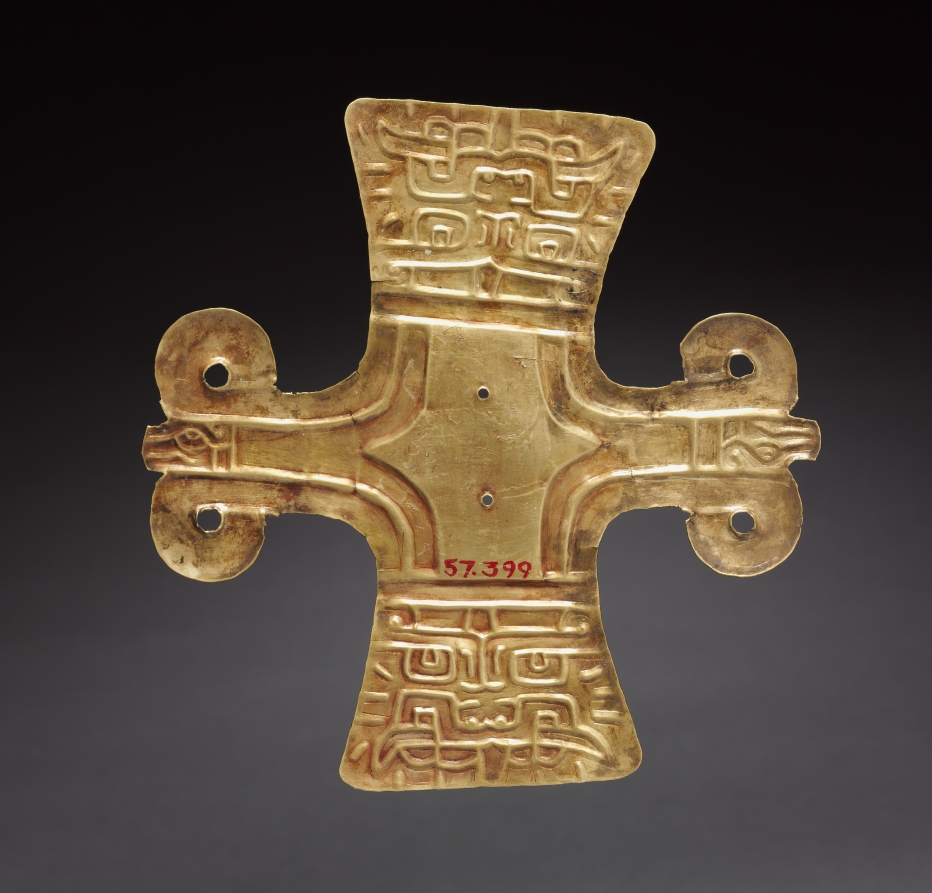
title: Cross-Shaped Ornament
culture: Peru, North Highlands, Chavín de Huantar(?), Chavín style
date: c. 500–200 BCE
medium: hammered and cut gold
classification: Metalwork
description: There seems to be a link between Chavín religion and appearance of the Andes’ first large precious-metal objects, made using revolutionary new metallurgical processes. Chavín may have developed these technical innovations to express the inexpressible, the "wholly other" nature of its religion. In many areas, elite men and women wore the ornaments as emblems of their ties to this religion, and eventually were buried with them. These 16 objects, along with three others not in the museum’s collection, are said to have come as a group from Chavín itself.